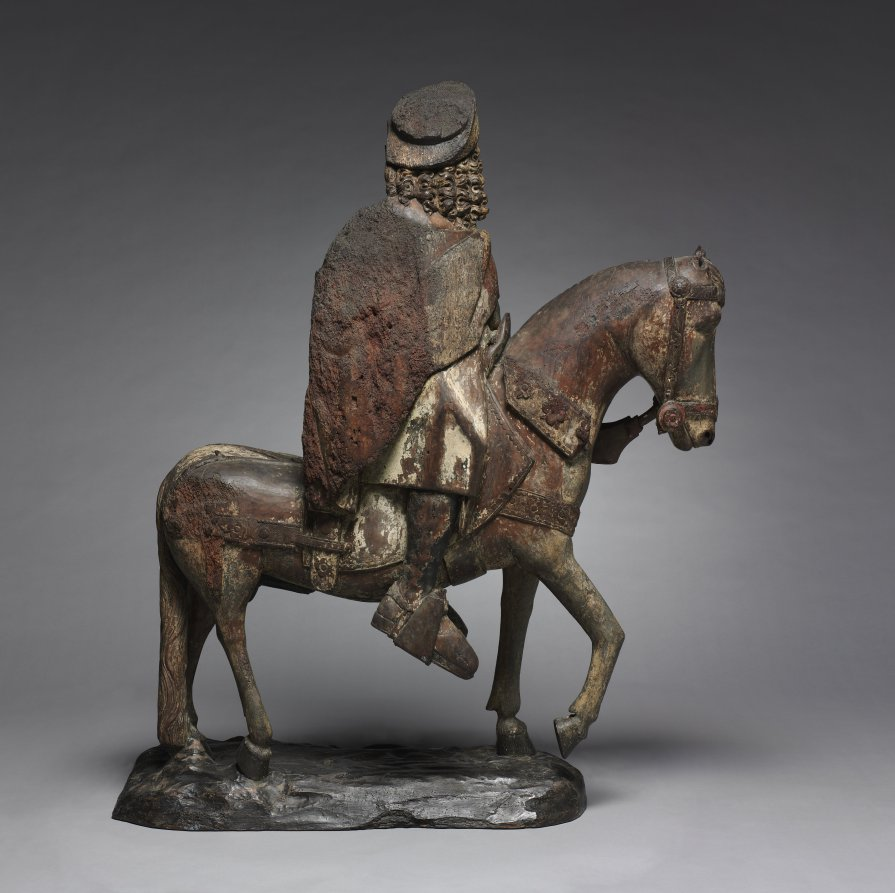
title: Saint Martin of Tours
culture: Northeast France or Flanders, 15th century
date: c. 1480–1500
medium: polychromed walnut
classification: Sculpture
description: According to tradition, Saint Martin was born during the reign of Constantine the Great (306–37 CE) and served as a member of the Roman cavalry in Gaul. There he earned a reputation for humility and boundless charity. During the severe winter of 322 CE at Amiens, Martin's compassion for others led him to divide his cloak with his sword, and to give half to a poor, naked beggar. This event, along with Martin's subsequent vision of the beggar as Christ, eventually led to the saint's widespread popularity throughout medieval Europe. Saint Martin was particularly venerated in the city of Tours where he served as bishop, where his tomb is located, and of which he remains the patron saint.